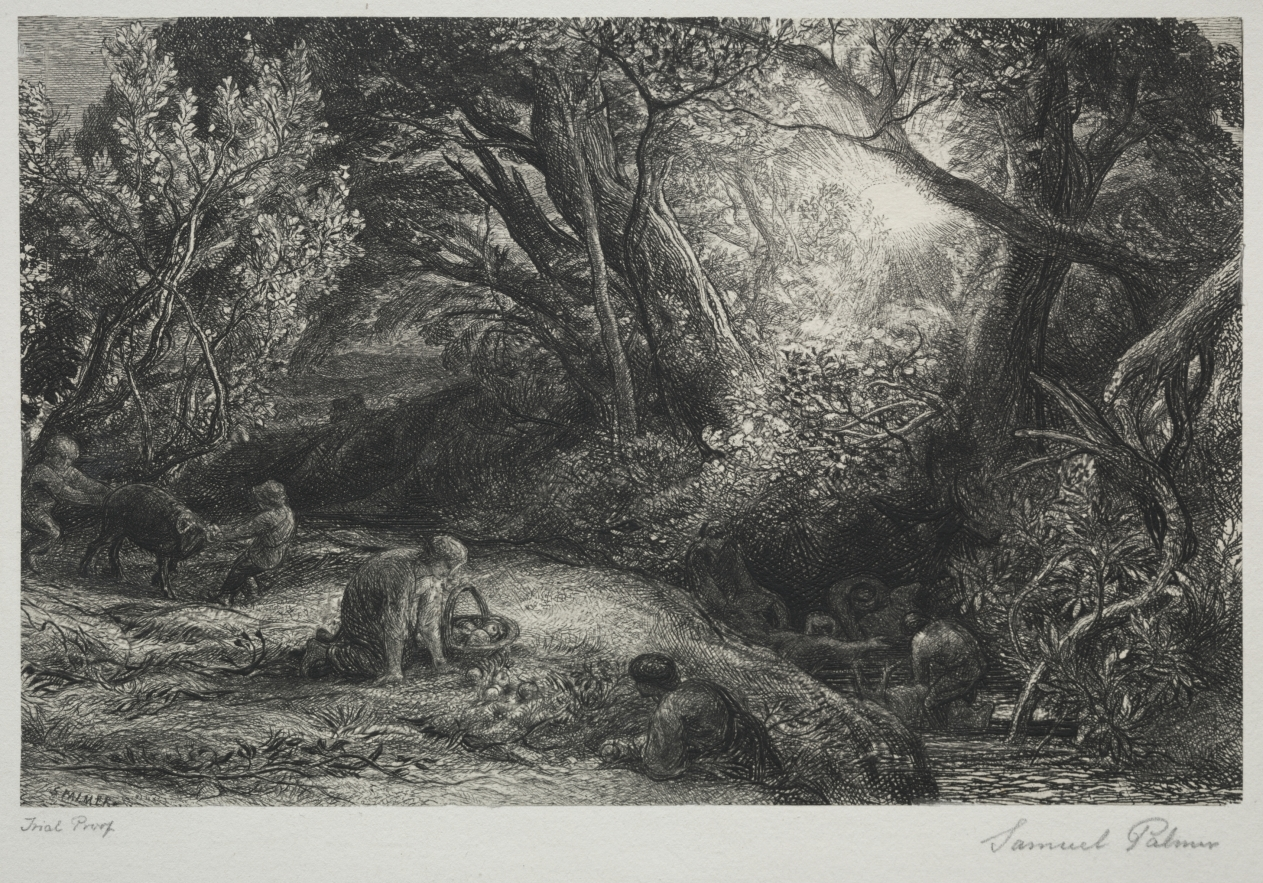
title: The Morning of Life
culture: England, 19th century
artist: Samuel Palmer (British, 1805–1881)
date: 1860–1861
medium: etching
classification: Print